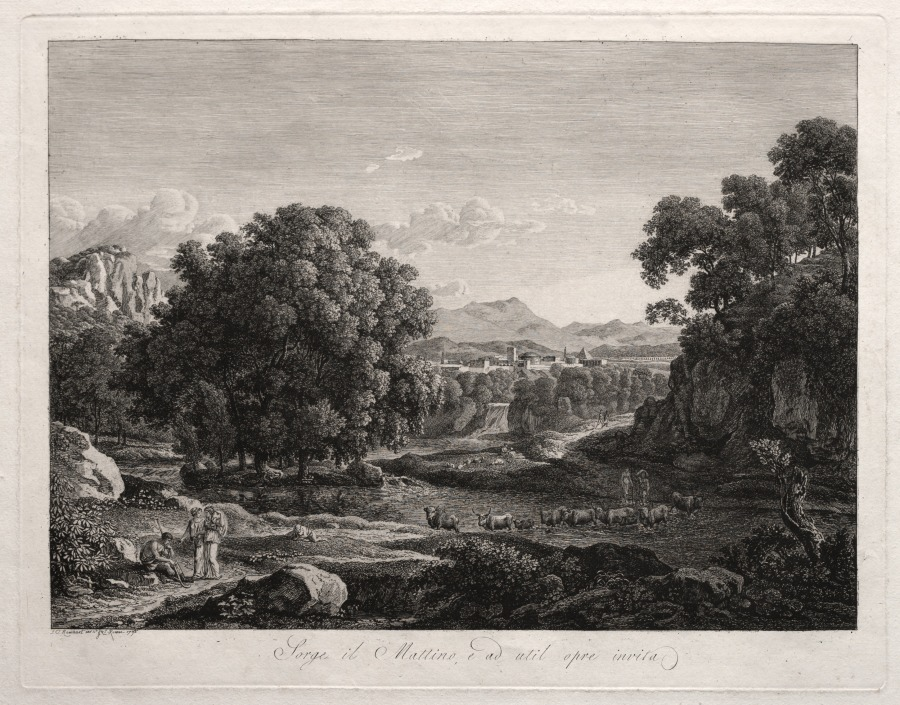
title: Heroic Landscape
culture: Germany, 19th century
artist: Johann Christian Reinhart (German, 1761–1847)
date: 1795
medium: etching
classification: Print